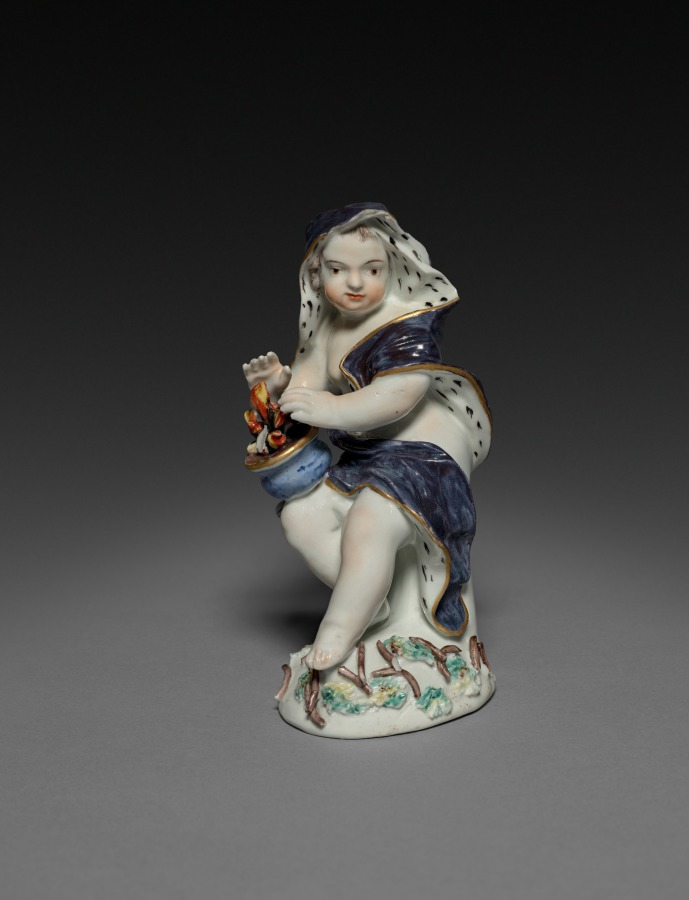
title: Winter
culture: England (Derby), 18th century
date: c. 1760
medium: soft-paste porcelain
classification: Ceramic